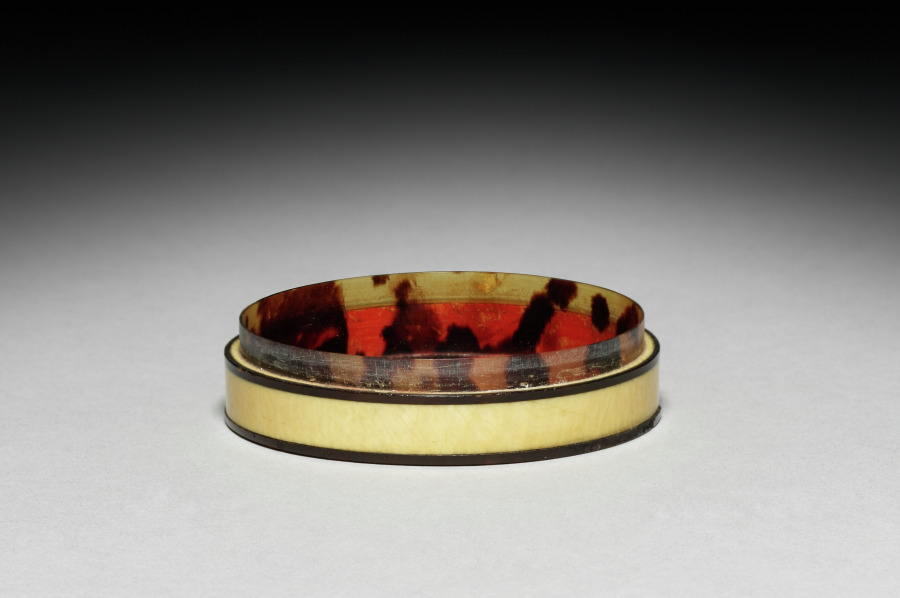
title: Snuff Box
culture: Germany, 18th century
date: c. 1770–1775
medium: tortoiseshell and ivory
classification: Miscellaneous